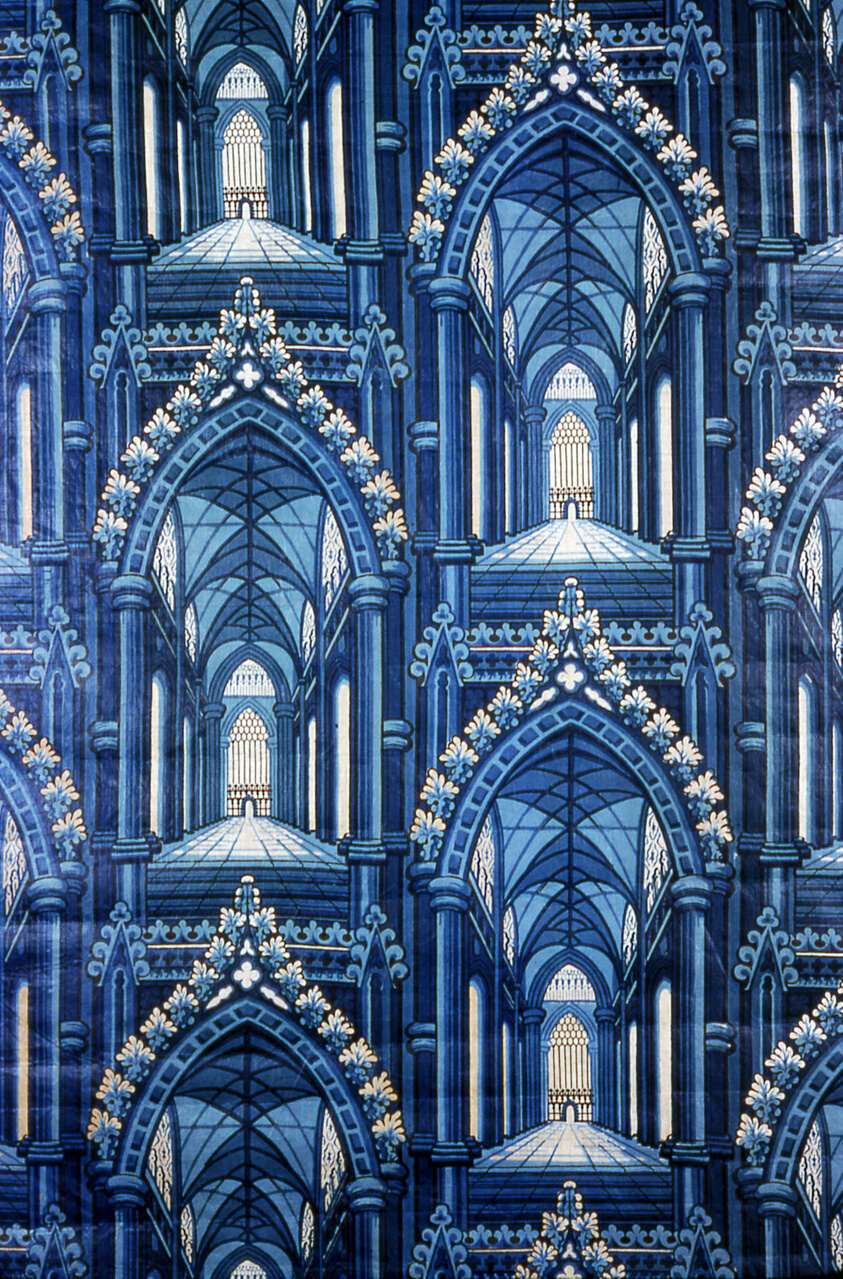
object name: Textile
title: Curtain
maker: Possibly England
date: 1840/1880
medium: Cotton and wool, plain weave with supplementary patterning wefts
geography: England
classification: weaving; printed; textile